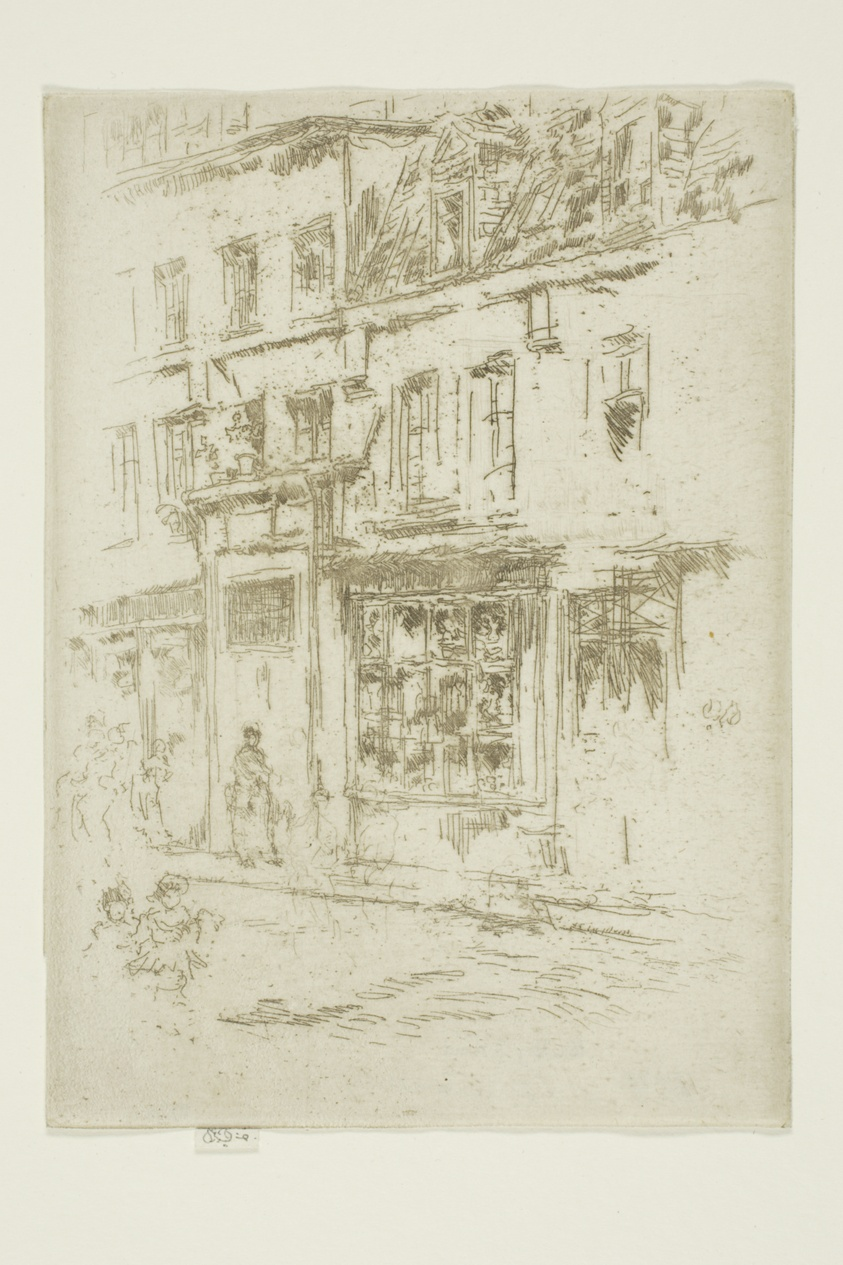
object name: Print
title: Petite Rue au Beurre, Brussels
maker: James McNeill Whistler (American, 1834-1903)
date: 1887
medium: Etching with foul biting in brown ink on ivory laid paper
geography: United States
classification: etching; foul biting; print; prints and drawing; paper